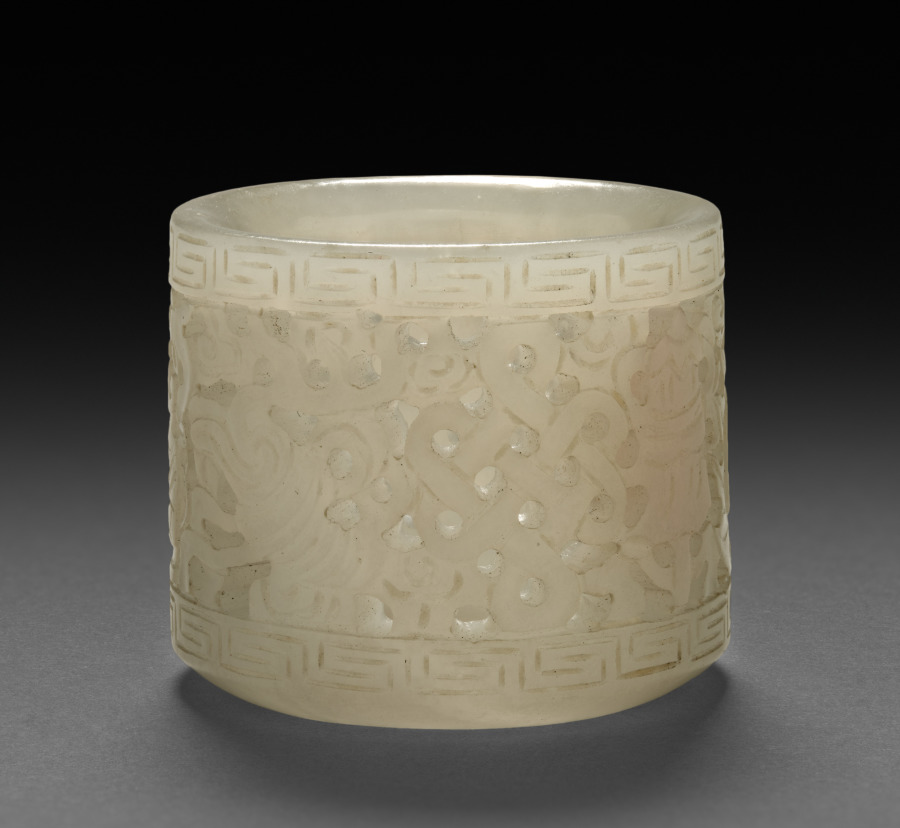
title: Thumb Ring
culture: China, Qing dynasty (1644-1911) or Republican period (1912-49)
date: 1800s–1900s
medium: white jade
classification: Jewelry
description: Jade rings were worn by men on the thumb of the right hand to assist with holding and pulling the string of the archer’s bow. However, thumb rings were also fashionable accessories for civil officials in the late Qing dynasty.